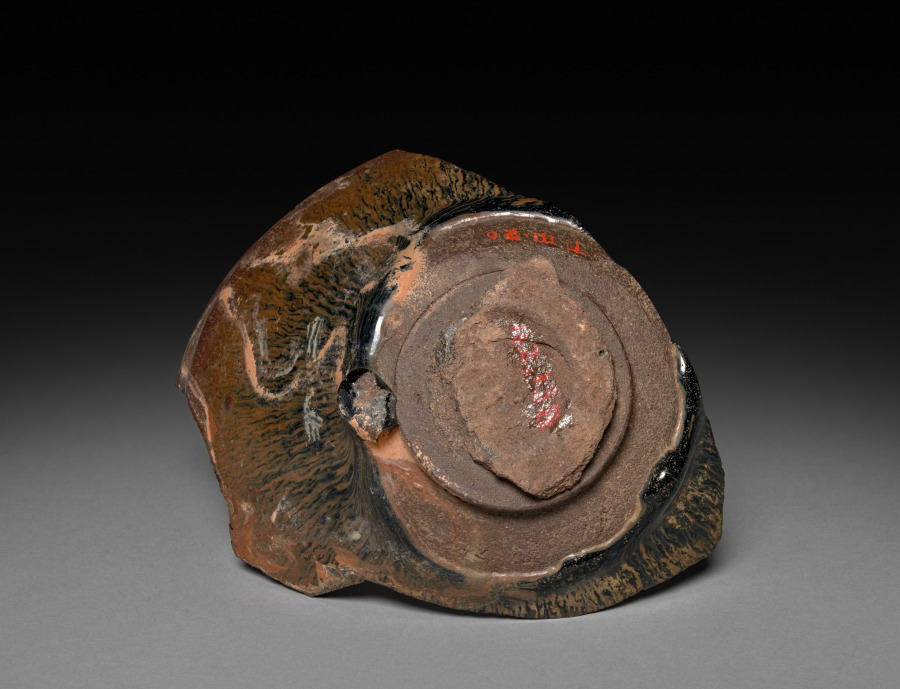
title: Shard of Tea Bowl: Jian ware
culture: China, near Shui ch'i, Song dynasty (960-1279)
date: 960–1279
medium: stoneware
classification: Ceramic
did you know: Jian ware was made of a very hard, coarse grain.